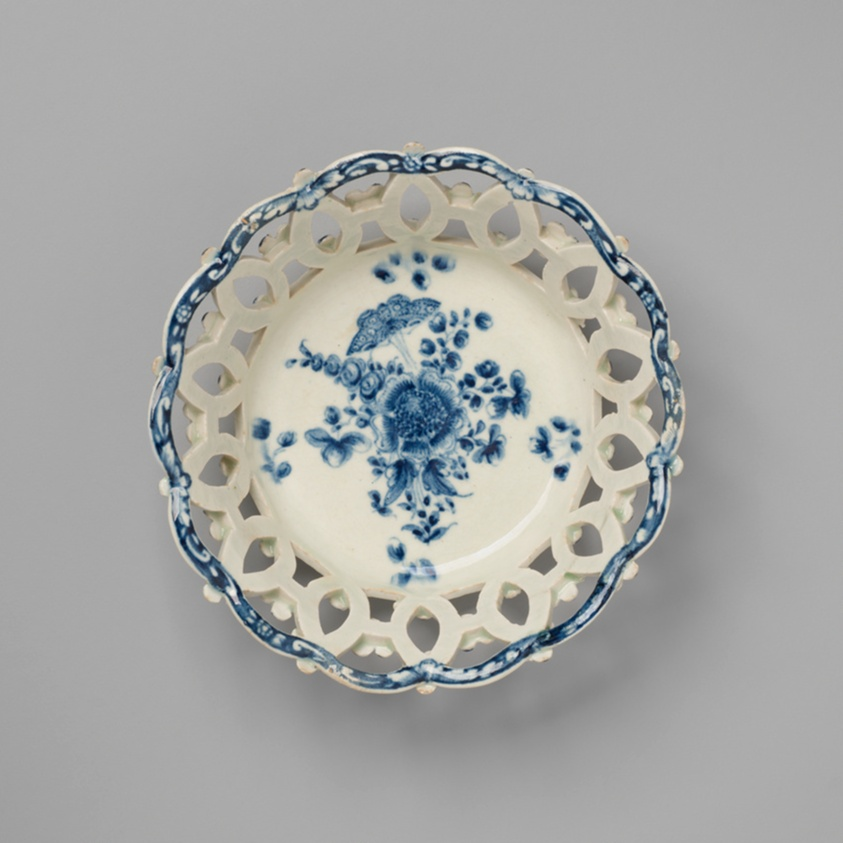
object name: Ceramics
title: Fruit Basket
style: 18th Century, american colonial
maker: American China Manufactory (American, active 1770-72); Philadelphia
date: c. 1770–72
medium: Soft-paste porcelain, underglaze blue decoration, and glaze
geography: Philadelphia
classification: porcelain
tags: flowers, Bonnin and Morris, basketry, butterflies, moth, peonies